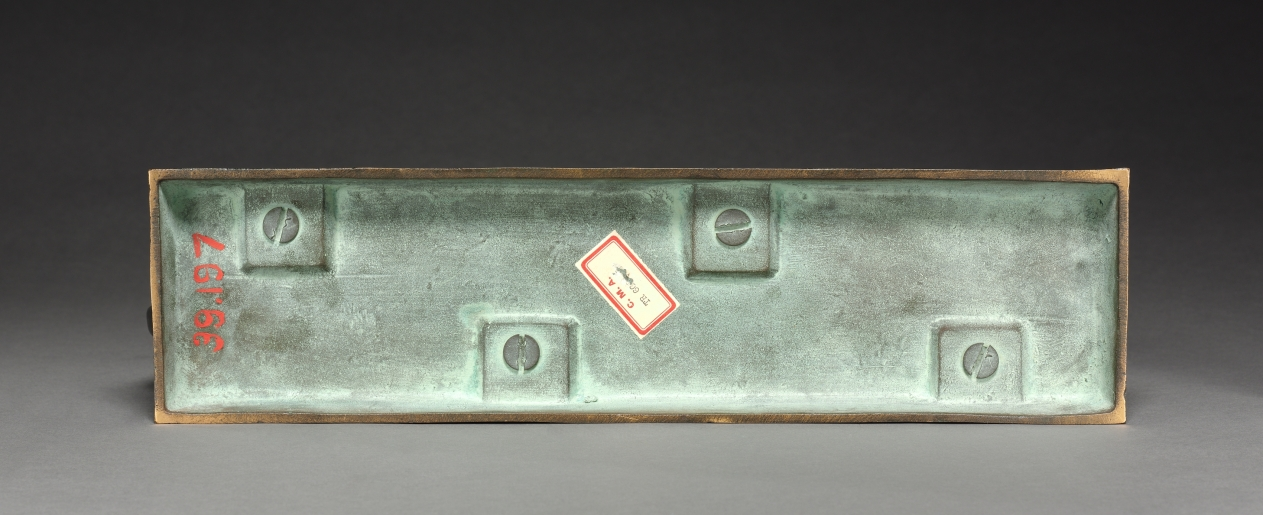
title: Walking Tiger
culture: France, 19th century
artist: Antoine-Louis Barye (French, 1796–1875)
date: c. 1836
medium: bronze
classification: Sculpture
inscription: Signed on base: "Barye"